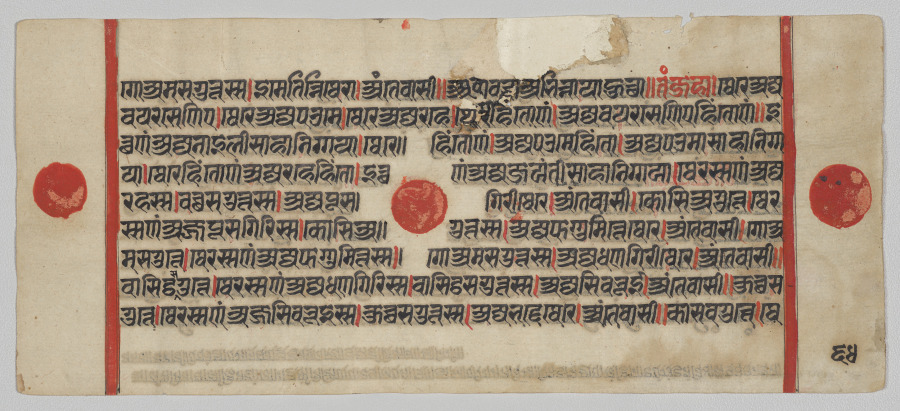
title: Text, Folio 64 (verso), from a Kalpa-sutra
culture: Western India, Gujarat, last quarter of the 15th century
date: c. 1475–1500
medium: Gum tempera, ink, and gold on paper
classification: Painting